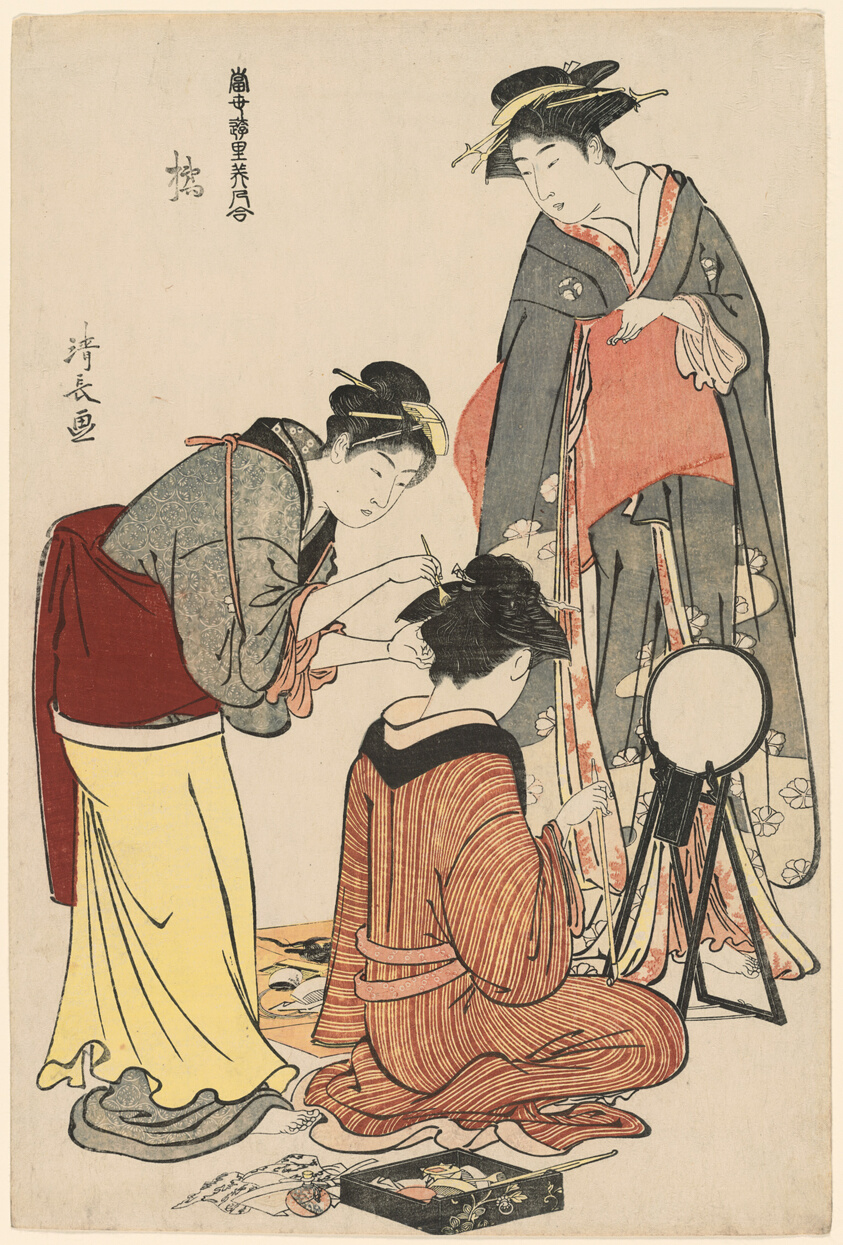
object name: Print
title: Entertainers of the Tachibana, from the series "A Collection of Contemporary Beauties of the Pleasure Quarters (Tosei yuri bijin awase)"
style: Japanese (culture or style)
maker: Torii Kiyonaga (Japanese, 1752-1815)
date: c. 1782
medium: Color woodblock print; oban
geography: Japan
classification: woodblock print; print; asian art